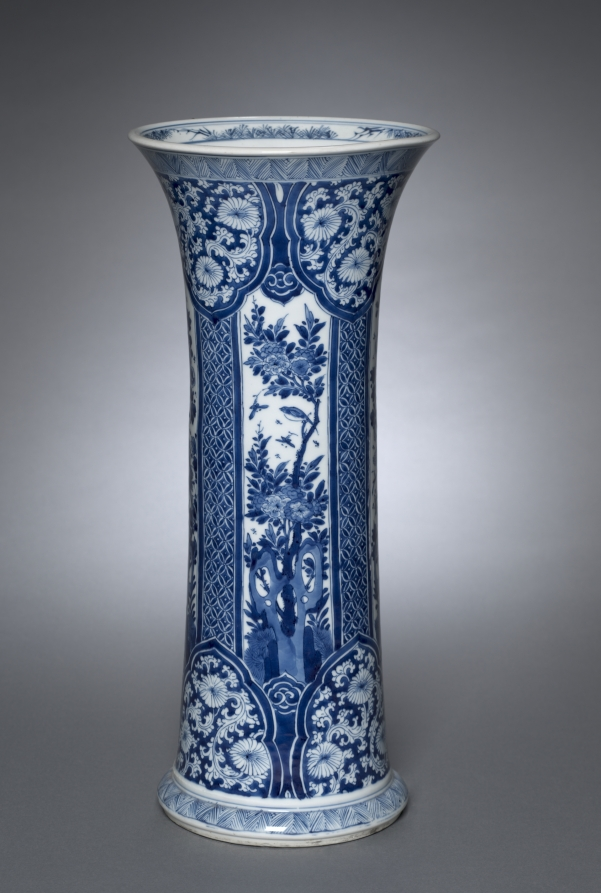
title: Vase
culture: China, Jiangxi province, Jingdezhen kilns, Qing dynasty (1644–1911), Kangxi reign (1662–1722)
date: 1662–1722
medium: porcelain with underglaze blue decoration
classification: Ceramic